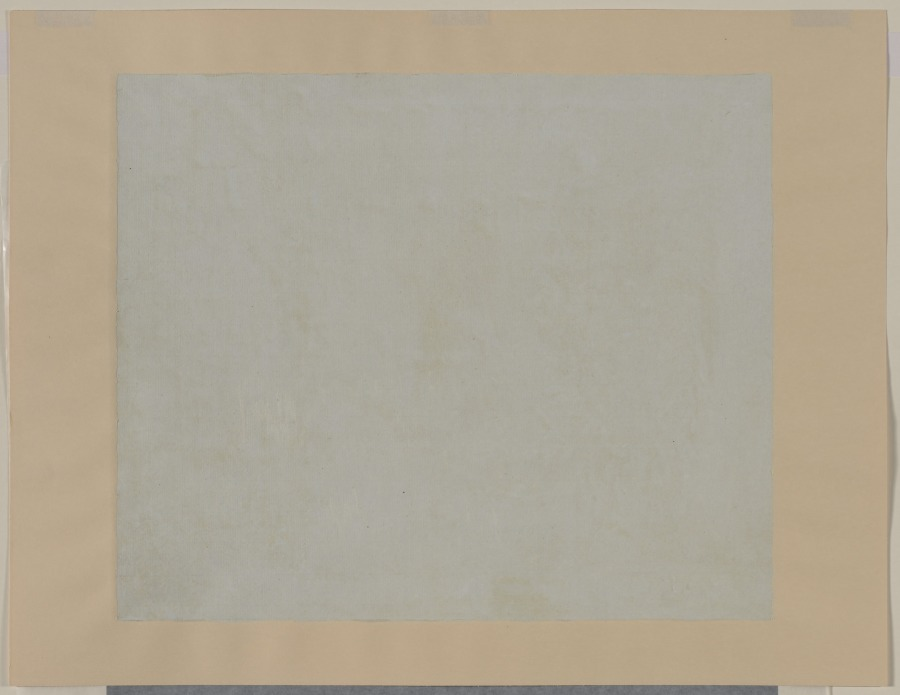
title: Waterfall between Chiavenna and Mount Splügen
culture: England, 18th century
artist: Francis Towne (British, 1739/40–1816)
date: 1784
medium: watercolor with graphite, point of brushwork, and selective glazing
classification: Drawing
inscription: signed and dated, in pen and brown ink, at lower left: Francis Towne / dell. 1784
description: Francis Towne spent a year painting the architectural wonders of Rome and its environs on what was to be his only trip to the Continent. On the journey back to England, he traveled over the Alps, visiting the Italian Lakes, crossing over the Splügen Pass into Switzerland, finally arriving in Geneva. His distinctive style, characterized by an austere simplicity of vision, found its fullest expression in his Alpine views, described by one scholar as "unquestionably among the greatest by any 18th-century artist of mountain scenery." Against the earth tones of the brooding cliffs, the crash of the waterfall is like a white explosion.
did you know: This drawing once belonged to Paul Oppé, one of Britain's most esteemed art historians and a legendary authority on English drawings.